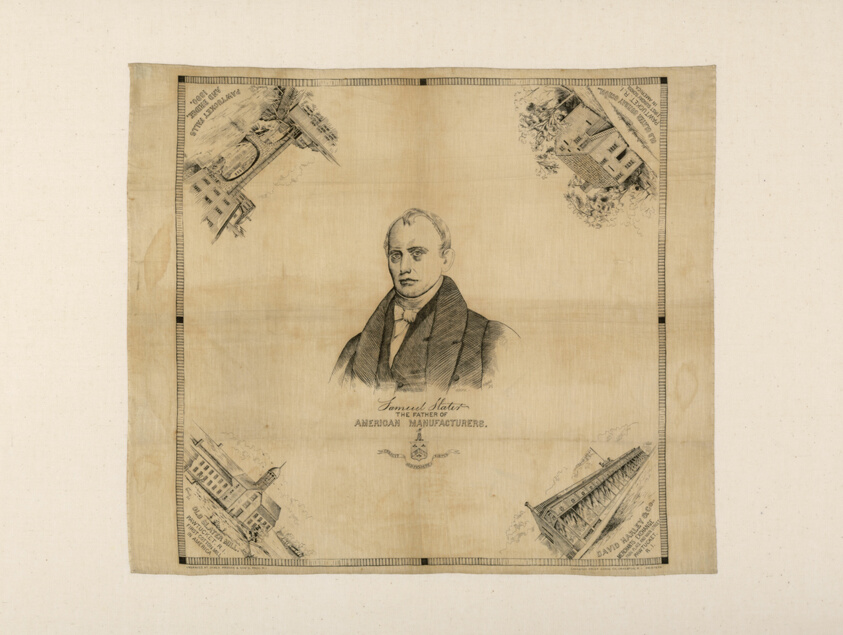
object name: Textile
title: Samuel Slater, The Father of American Manufacturers (Handkerchief)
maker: Engraved by James Provan & Son's (American, active 1890s) after a portrait by James Sullivan Lincoln (American, 1811–1888); Manufactured by Cranston Print Works Co. (American, active 1890); United States, Rhode Island, Cranston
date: 1890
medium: Cotton, plain weave; engraved roller printed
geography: Rhode Island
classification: textile; weaving - printed; weaving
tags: propaganda